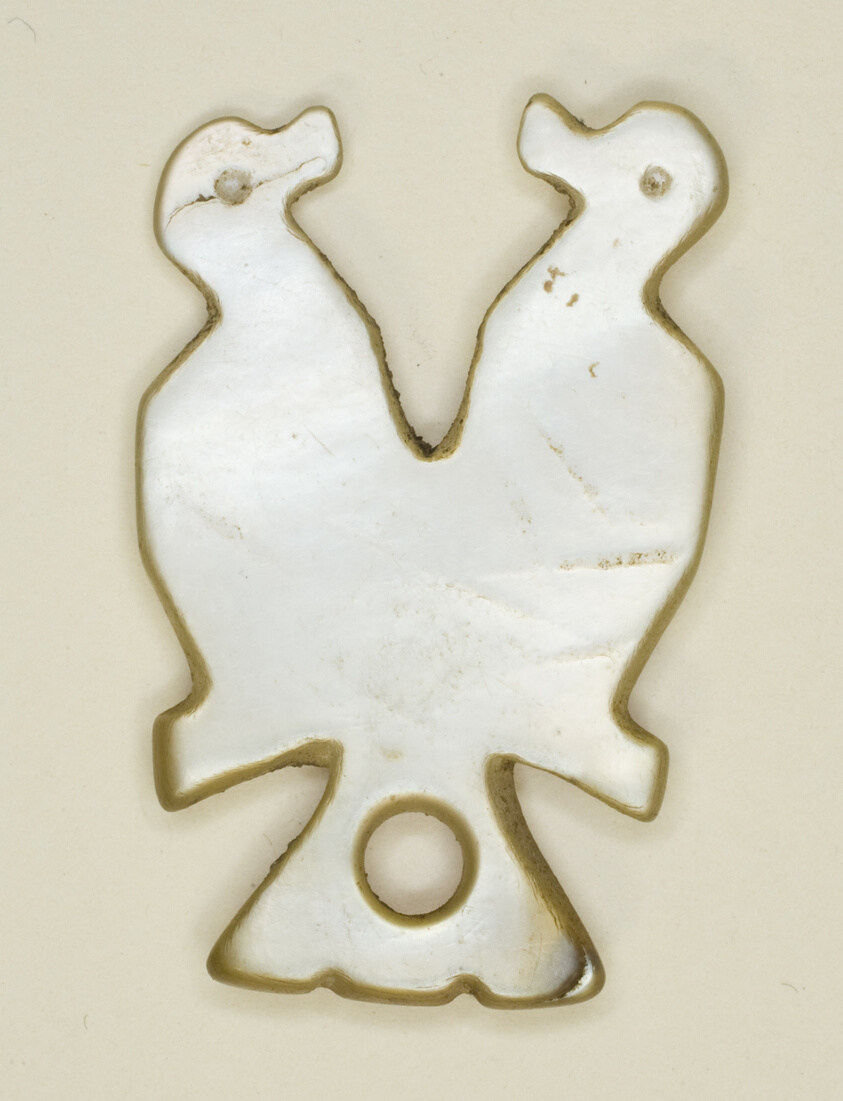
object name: Costume and Accessories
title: Amulet in the Shape of Two Mirror-Imaged Birds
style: coptic (period)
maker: Egyptian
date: Byzantine Period (4th–7th century)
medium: Shell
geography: Egypt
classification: amulet; jewelry; shell; ancient art; costume